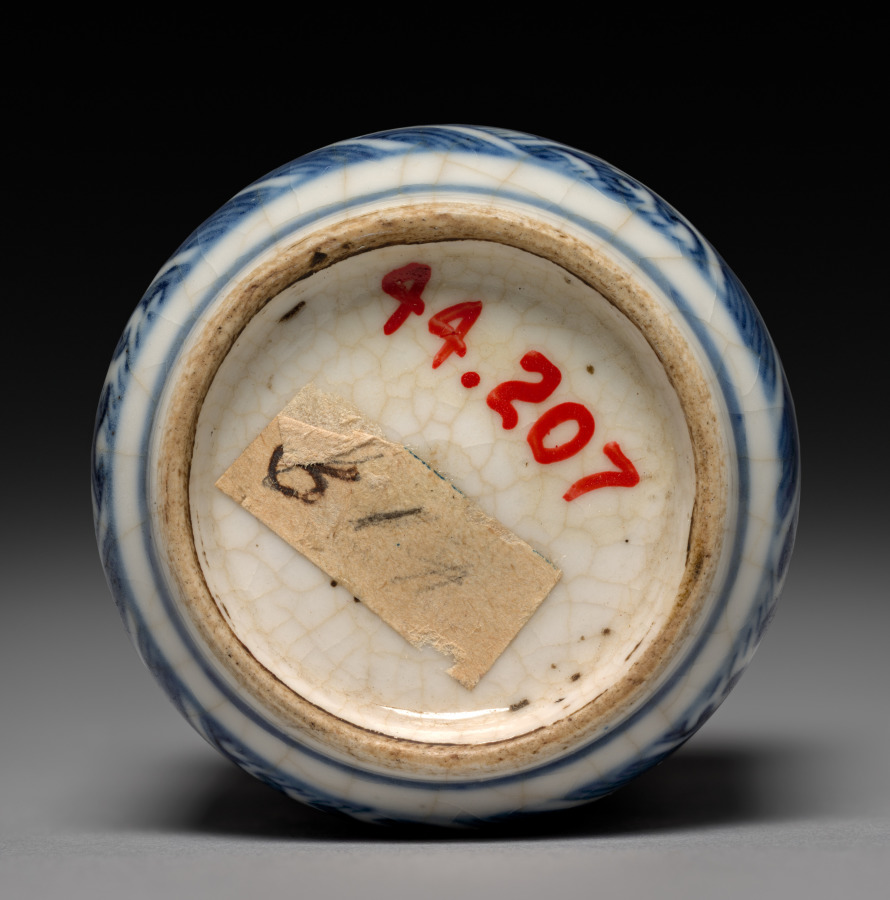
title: Snuff Bottle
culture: China, Qing dynasty (1644-1911), Kangxi reign (1662-1722)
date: 1662–1722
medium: porcelain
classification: Ceramic